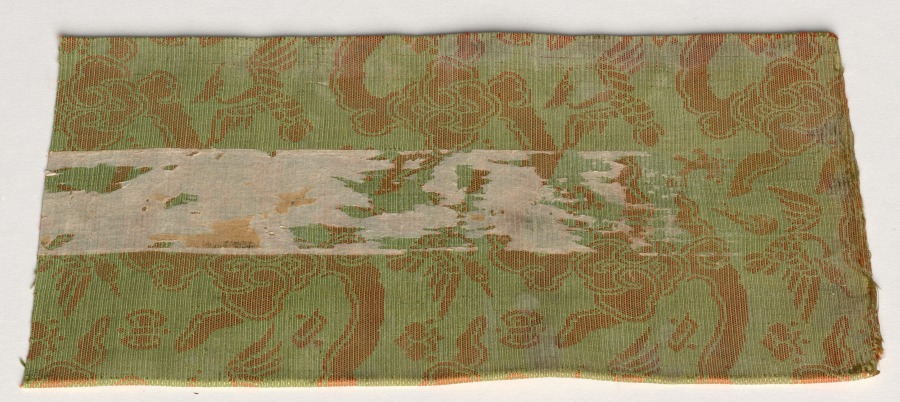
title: Book Cover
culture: China, Qing dynasty (1644-1911)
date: 1680–1720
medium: silk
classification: Textile